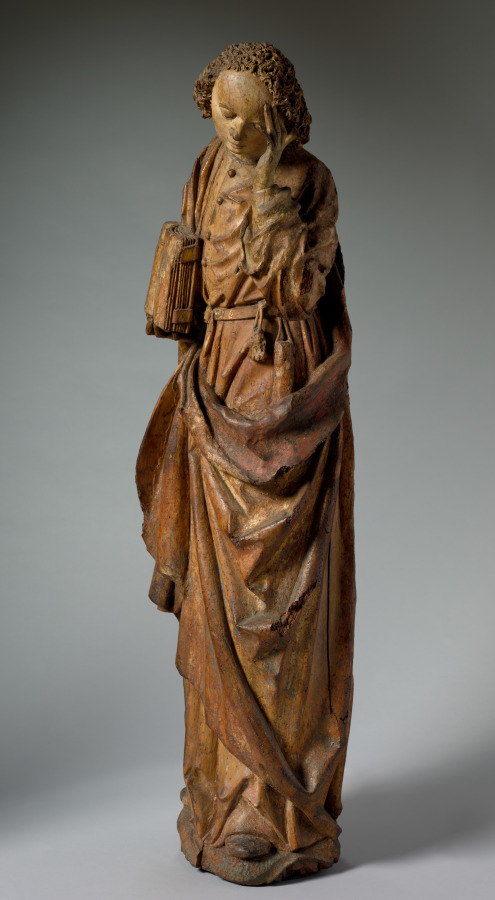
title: Saint John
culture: France, 15th century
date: 1450–1499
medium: wood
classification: Sculpture